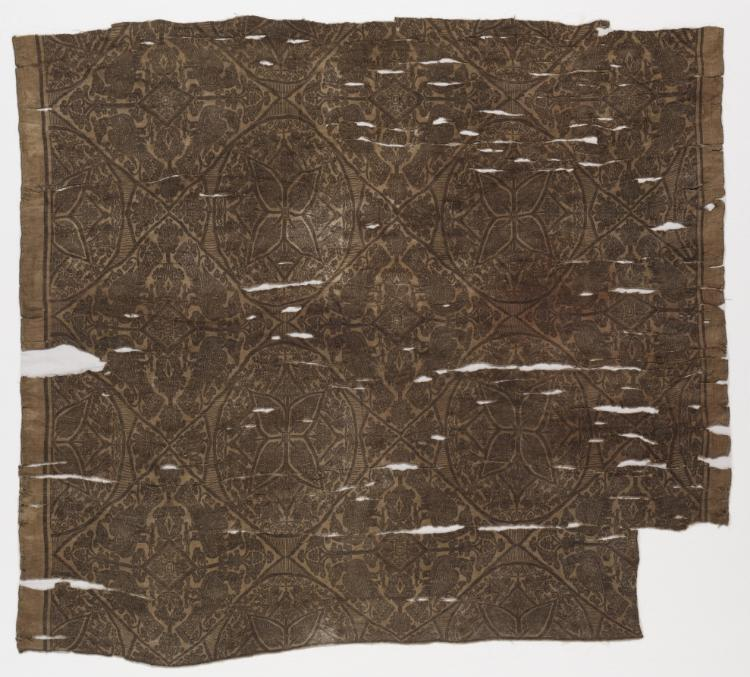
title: Fragment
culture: Iran or Iraq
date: 1420–1955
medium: Silk: compound twill weave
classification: Textile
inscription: sana'ahu 'Ali bin Yusuf bin al-Marzuban al-...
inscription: li-yasta 'malhu al-amir al-ajall Qawam al-Mulk Abu 'Abd Allah 'Isa bin Ibrahim al-Harithi atala Allah fi al-m'ali baqa['a]hu wa-harasa fi iqtifa[']al-makarim fana['a]hu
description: The weave provides different design for each side. On the front, the overall lozenge pattern has alternating rows of ornamented ovals and diamonds. The large diamonds have a large four-leaved motif super-imposed over a diamond with trees in each corner. The foliate ground with four pairs of opposed griffins fills the interspaces to the oval border. The diamonds have two opposed pairs of birds each flanking a Tree of Life and standing on a plant motif; these enclose a smaller central diamond with trees in each corner and a central square. On the reverse, the plain ground of natural tan has two brown bands in large and small Kufic inscription.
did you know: The design is at right angles to warp.